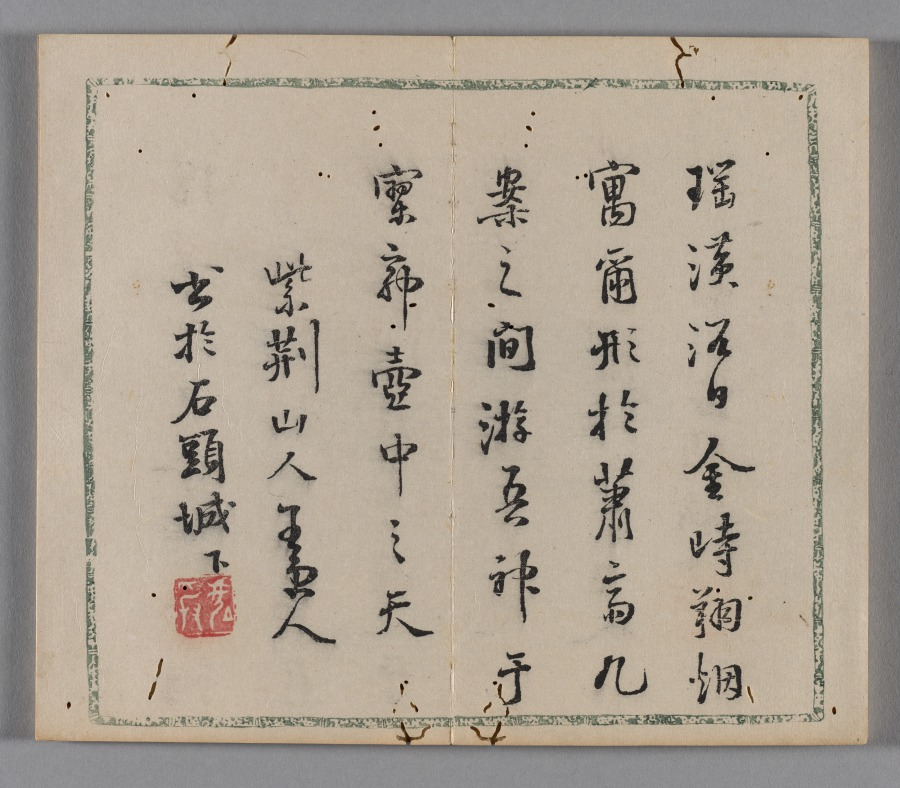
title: Ten Bamboo Studio Collection of Calligraphy and Painting: Round Fans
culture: China, Qing dynasty (1644-1911)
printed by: Hu Zhengyan (Chinese, c. 1584–1674)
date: 1633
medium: Woodblock-printed book; ink and colors on paper; first edition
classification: Print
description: Color printing reached a level of perfection in the early 1600s, as seen in this Ten Bamboo Studio Collection of Calligraphy and Painting and the Mustard Seed Garden Manual of Painting (printed 1679 and 1701). The painterly quality, precision in registering (aligning) the woodblocks, and harmonious colors made them the most successful color print editions in Chinese history. Both editions were printed and compiled in Nanjing, spread nationwide, and had a great impact on the arts in Japan and Korea.